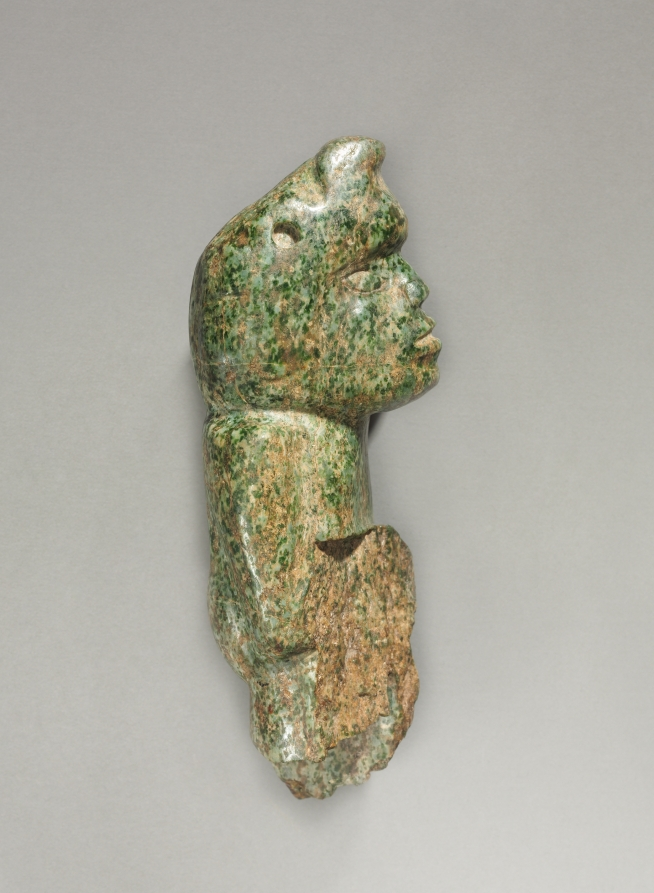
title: Axe-Shaped Figure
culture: Mexico, Oaxaca, Mixteca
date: after 900(?)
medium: Metadiorite (?)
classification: Sculpture